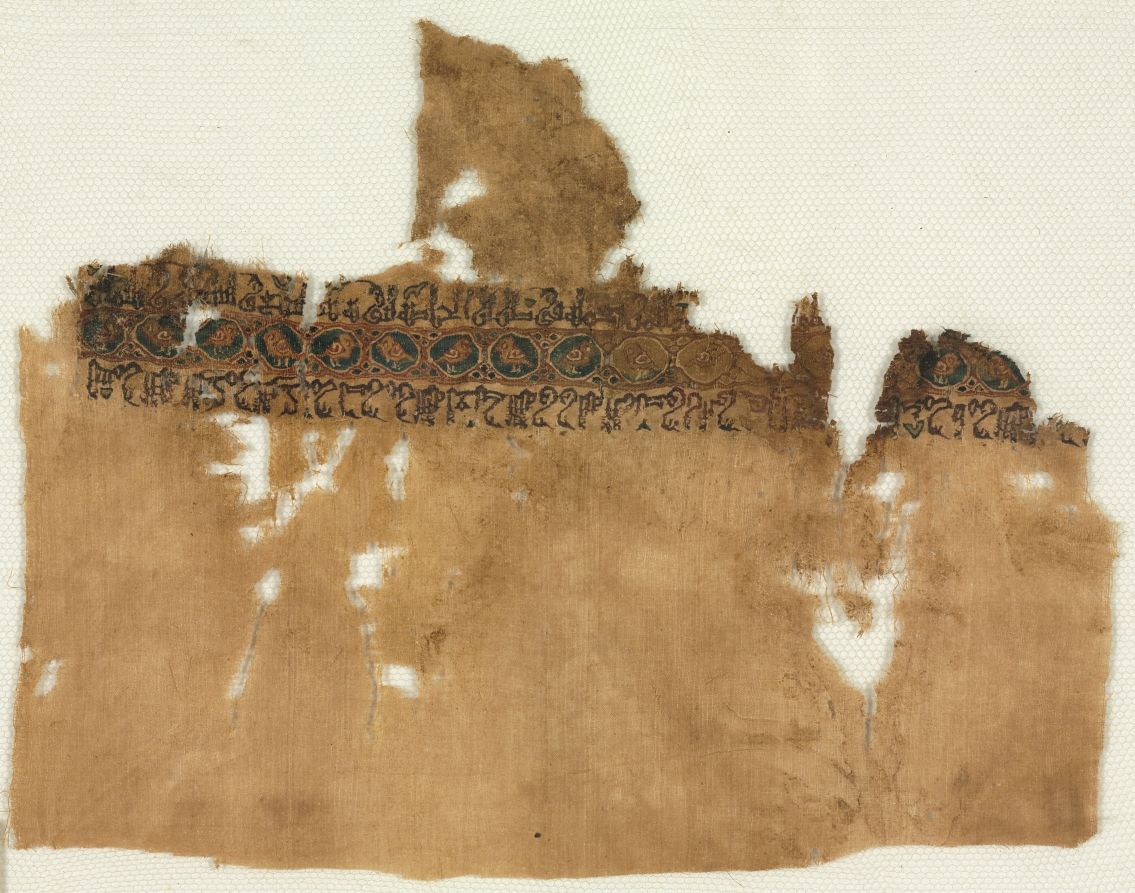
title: Fragment of a Tiraz, Probably the End of a Turban Cloth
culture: Egypt, Tunah, Fatimid period, Caliphate of al-Hakim, AH 399 (A.D. 1008-1009)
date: 1008 – 1009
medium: tabby ground with inwoven tapestry ornament; linen and silk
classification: Textile